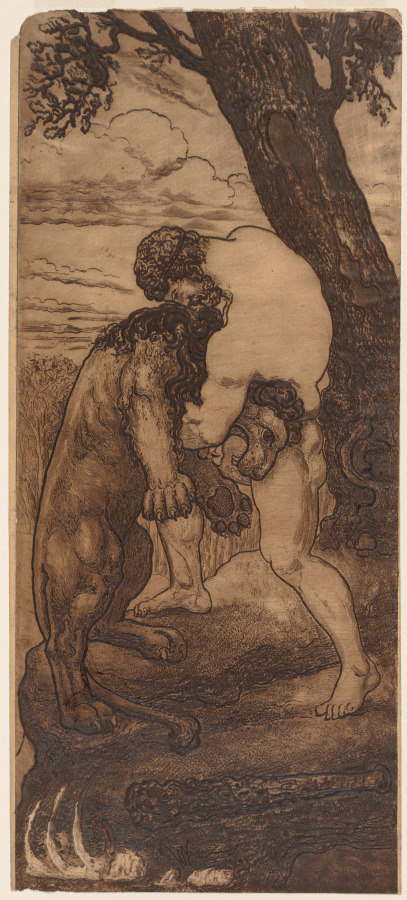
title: Hercules and the Nemean Lion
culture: France, 19th century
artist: Henri-Arthur Lefort des Ylouses (French, 1846–1912)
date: c. 1898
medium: gypsograph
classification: Print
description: Lefort des Ylouses used a combination of techniques to achieve the rich surface and variety of textures seen in Hercules and the Nemean Lion. Some lines, including outlines of forms, were bitten very deeply on the plate so that when printed, the paper was embossed for a three-dimensional, sculptural effect. The pattern on the rock beneath Hercules’s feet was obtained by putting a roughly textured paper on top of the etching ground and running the plate through the press, while the fine parallel lines in the sky are engraved. After the plate was inked, the artist carefully wiped its surface, leaving some areas dark brown and others pale beige. The Nemean lion was a vicious monster in Greek mythology. It survived because its golden fur was impervious to attack and its claws were exceedingly sharp. Hercules killed the Nemean lion by stunning it with his club and using his immense strength to strangle it to death.